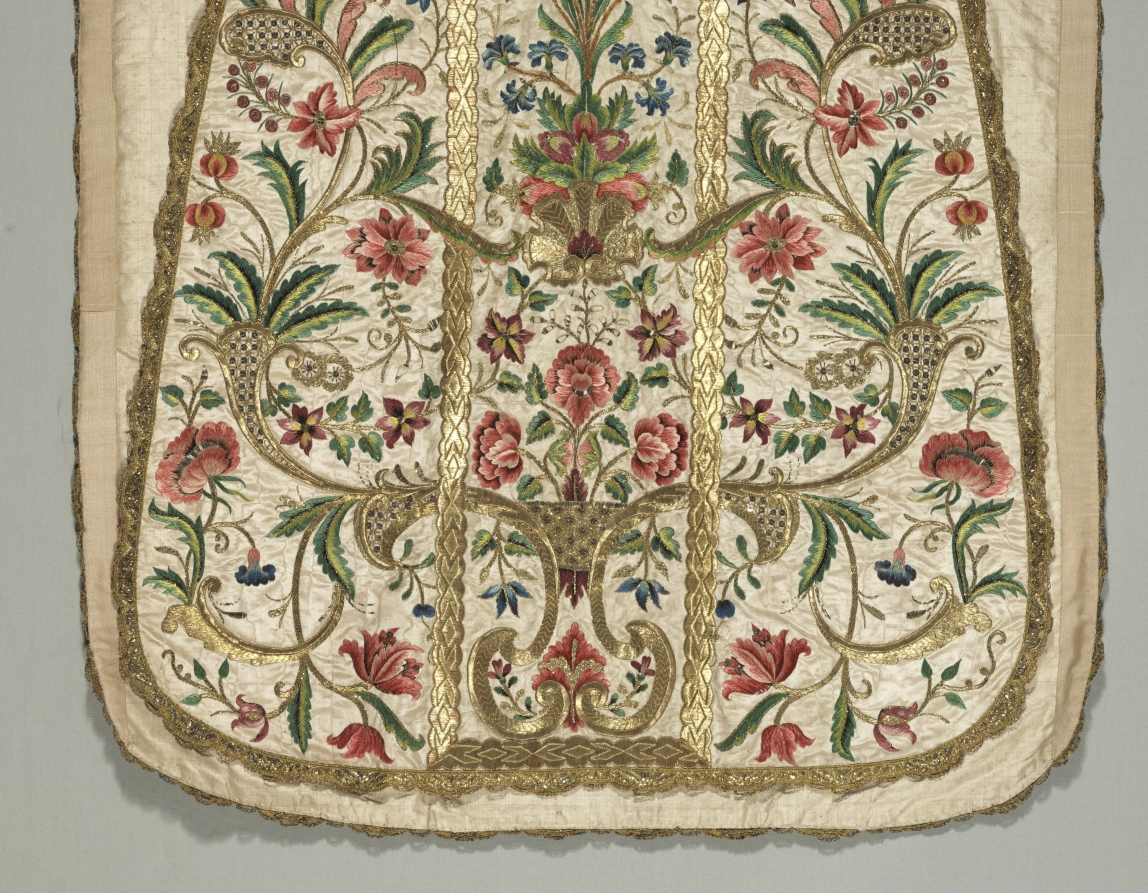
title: Chasuble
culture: Italy, 18th century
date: 1700s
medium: Silk and metallic threads; embroidery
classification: Textile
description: A beautiful design emanates from a vase in the center of this chasuble, displaying symmetrical flora that extend across embroidered gold braids into graceful curvilinear cartouches, reflecting contemporary architectural decoration. Also in the center, sheaves of wheat and grapes represent the bread and wine of the Mass. Gold sequins within thread-outlined squares illustrate fine quality workmanship. The decoration of the stole and chalice veil is similar to the chasuble, also on moiré (watered) silk fabric. The stole, an insignia of the office of deacons and priests, is worn under a chasuble, and the chalice veil—bearing the monogram of Jesus Christ, ihs, in the center—covers the chalice and paten (the plate holding the Eucharistic bread).